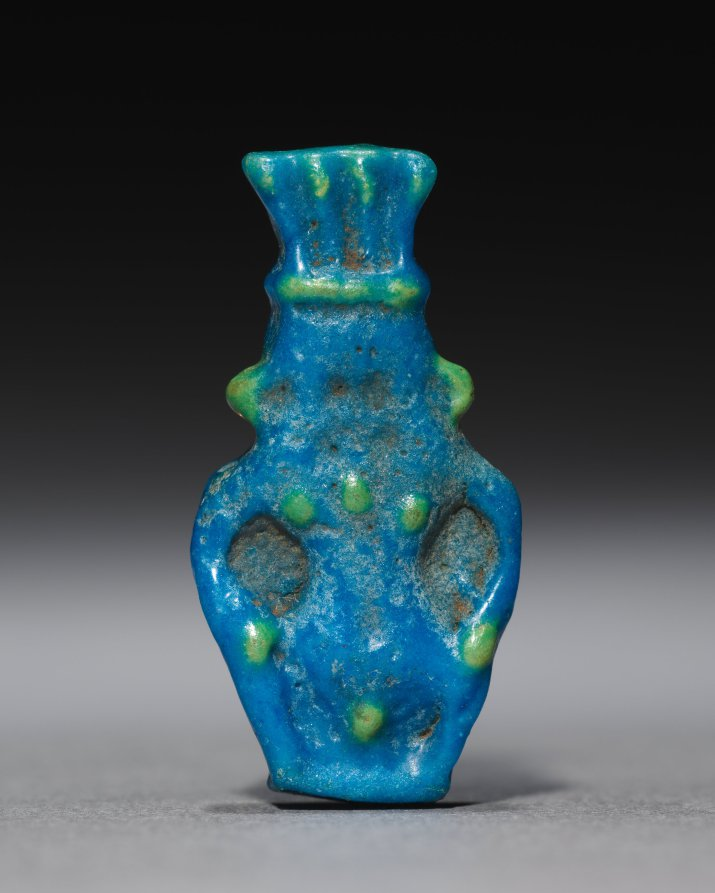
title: Amulet of Bes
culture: Egypt, Greco-Roman period (332 BCE–395 CE), Roman empire (30 BCE–395 CE)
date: 30 BCE–395 CE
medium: polychrome faience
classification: Amulets